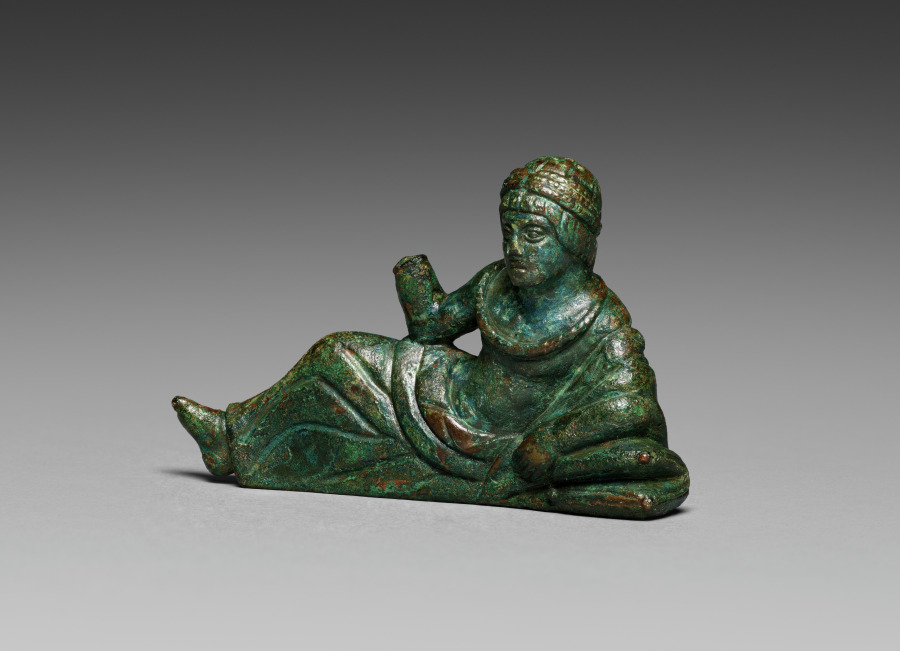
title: Vessel Ornament of Banqueter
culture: Etruscan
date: probably 400–375 BCE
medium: bronze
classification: Sculpture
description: This bronze banqueter figurine was one of six once adorning the rim of a large basin, now lost. Cast in molds with individualized details, most have grooves on their underside to attach to the basin. Minute traces of gilding remain on areas of clothing and skin (mostly visible only under magnification), suggesting that they may have been completely gilded. Two handles in the form of hippocampi, horses with serpentine tails, also belonged to the basin and are now displayed at the Michael C. Carlos Museum at Emory University. The basin may have been used to hold liquid for a banquet, or was perhaps funerary. This reclining bronze figurine’s left arm rests on the drapery covering his shoulder. His right arm is raised and broken at the wrist. Garlands rest on his head and chest. Traces of gilding remain in the garlands and drapery folds. The figurine is very similar to 1987.157, suggesting that he may have held a phiale mesomphalos, a shallow bowl used for wine libations to the gods.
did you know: Representations like this figurine suggest that Etruscan banqueters may have worn garlands made of flowers or leaves.